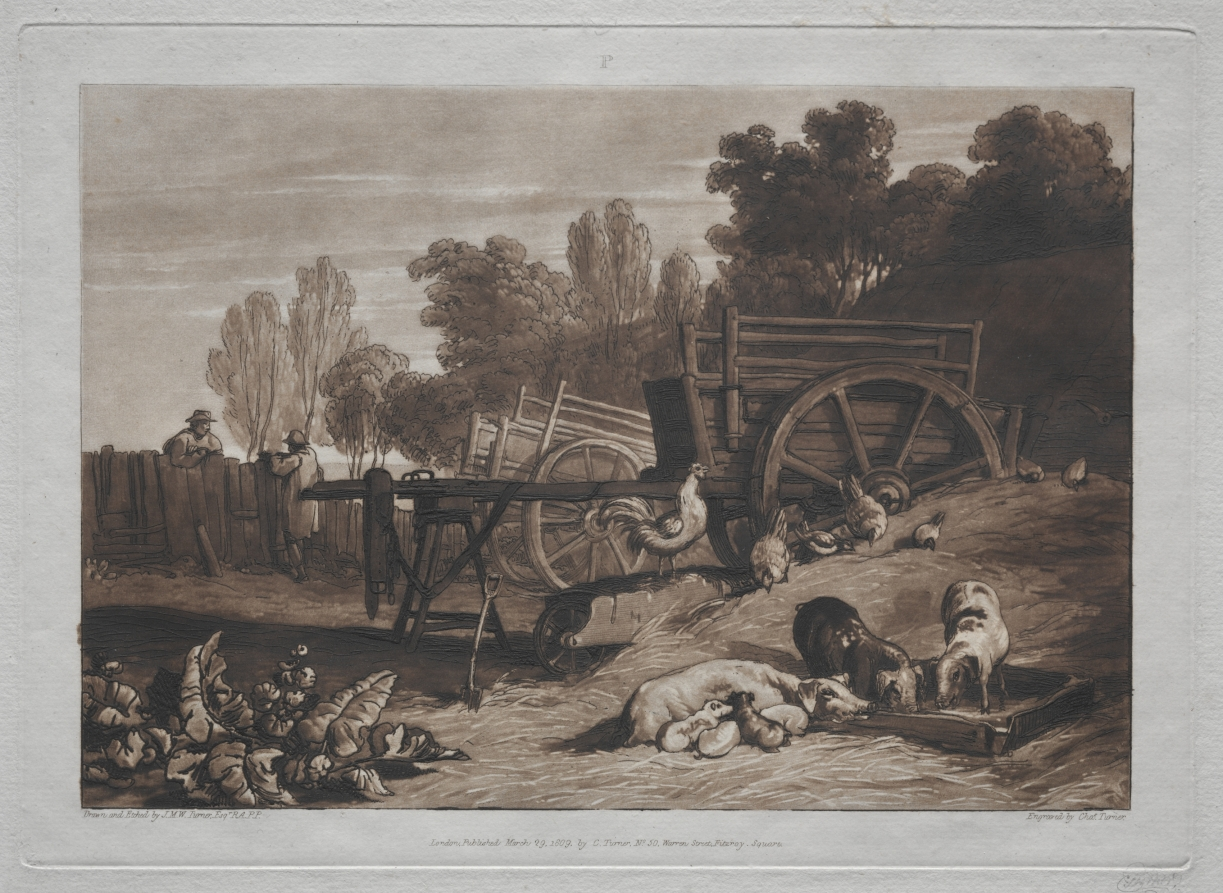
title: Liber Studiorum: The Farmyard with the Cock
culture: England, 19th century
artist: Joseph Mallord William Turner (British, 1775–1851)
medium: etching and mezzotint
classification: Print